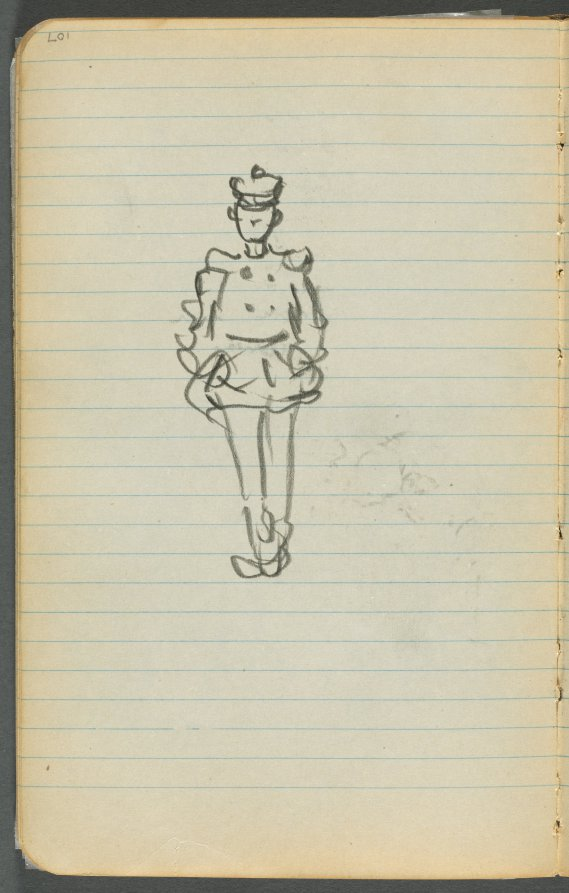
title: Sketchbook, page 107: Sailor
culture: America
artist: Maurice Prendergast (American, born Newfoundland [now Canada], 1858–1924)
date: 1905–10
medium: graphite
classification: Bound Volume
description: This sketchbook contains 69 pages of drawings, a diary largely devoted to the state of the artist's health, and a three-page discourse on the nature of genius and ideas.